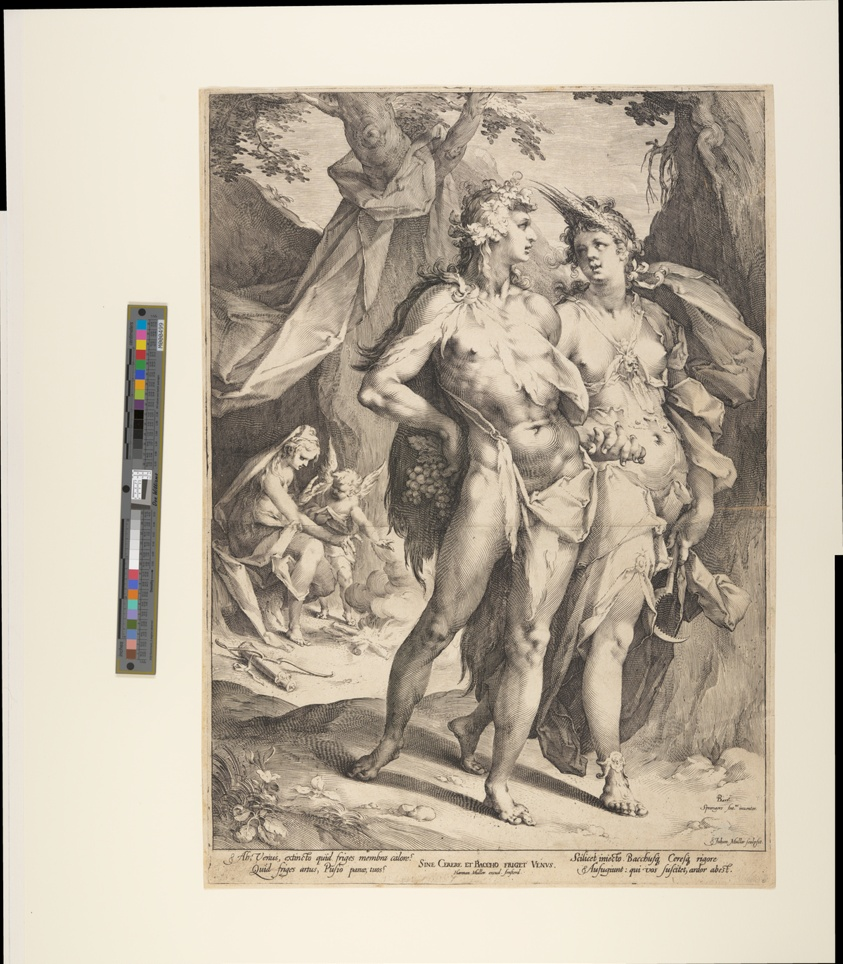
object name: Print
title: Bacchus and Ceres Leaving Venus (Sine Cerere et Baccho Friget Venus)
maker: Jan Harmensz Muller (Dutch, 1571–1628); Bartholomeus Spranger (Flemish, 1546–1611)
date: c. 1597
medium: Engraving on ivory laid paper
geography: Netherlands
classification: engraving; paper; print; prints and drawing